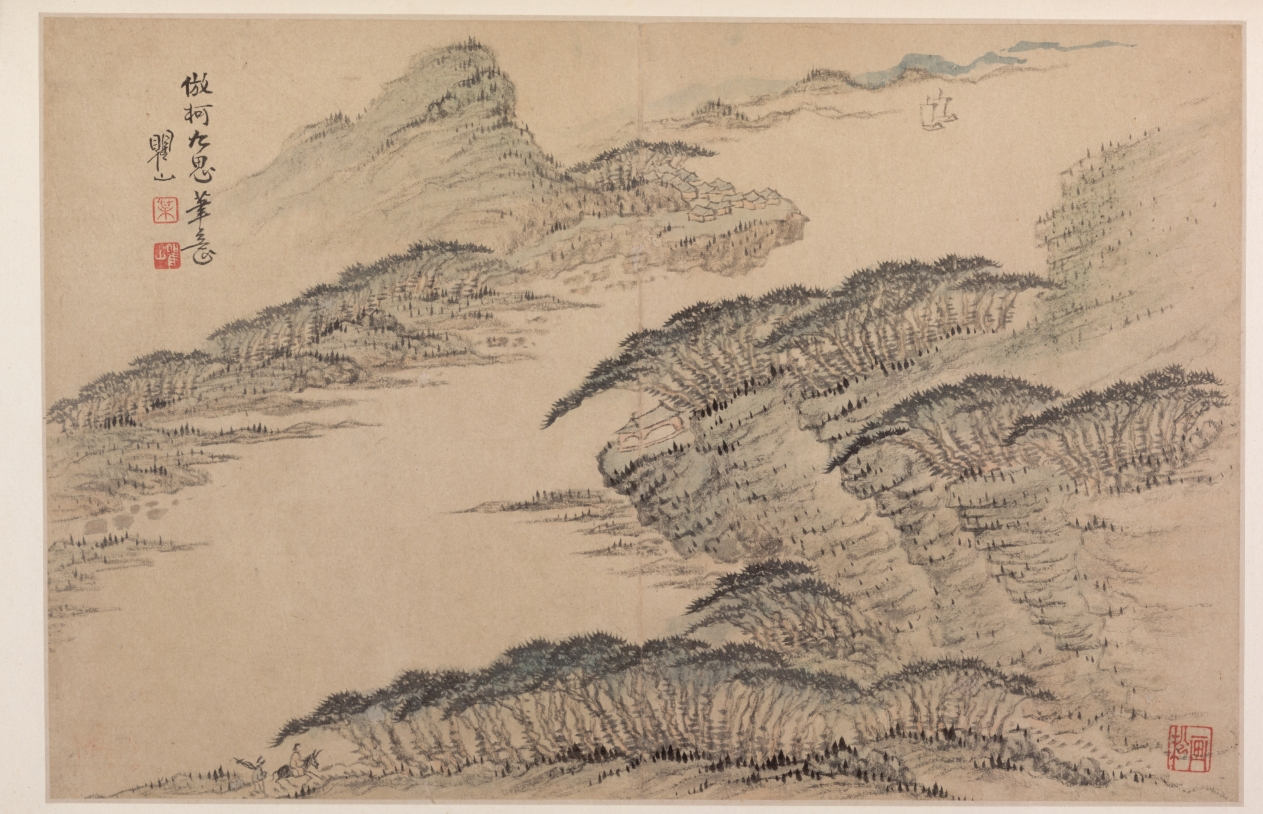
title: Landscapes in Various Styles after Old Masters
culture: China, Qing dynasty (1644-1911)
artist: Mei Qing (Chinese, 1623–1697)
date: 1690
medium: album leaf: ink and color on paper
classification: Painting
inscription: Spring Leaf I (formerly Leaf G). Artist's inscription, signature, and seals: Imitating Ke Jiusi's brush idea. Qushan [2 seals] Mei; Qushan [seal, lower right corner] Huasong.